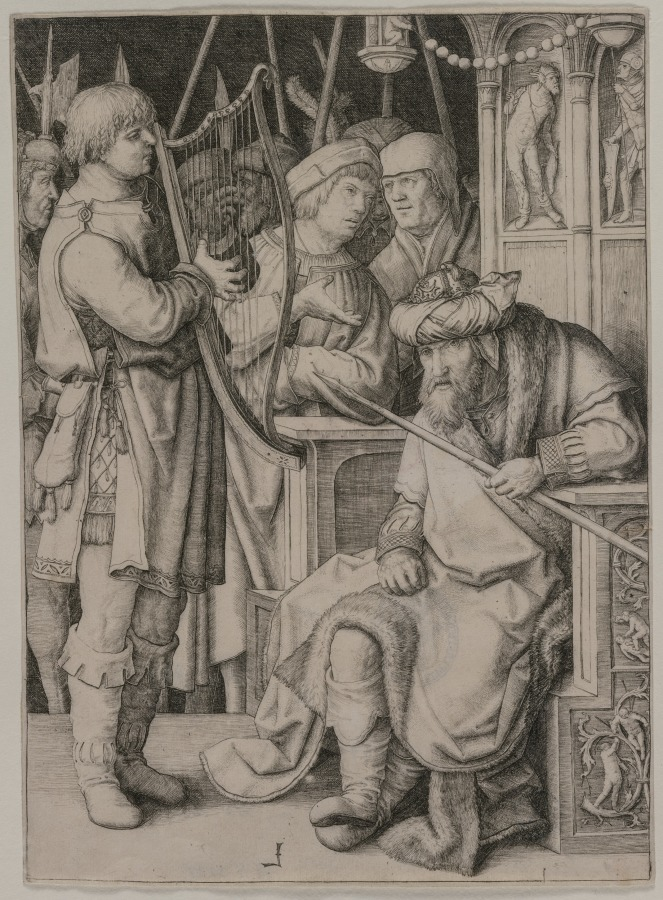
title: David Playing the Harp before Saul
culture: Netherlands, 16th century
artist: Lucas van Leyden (Netherlandish, 1494–about 1533)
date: c. 1508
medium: engraving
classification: Print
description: A skillful player of the harp, David was summoned to the court of King Saul in order to console the king who was often tormented by melancholy. Lucas van Leyden masterfully captured the despair of the king who sits uncomfortably upon his throne, his right foot angled convulsively over the left one, his gaze a blank stare. While playing, David looks calmly upon the ruler, as if to convey his confidence that music will provide the necessary balm to soothe the king’s soul.